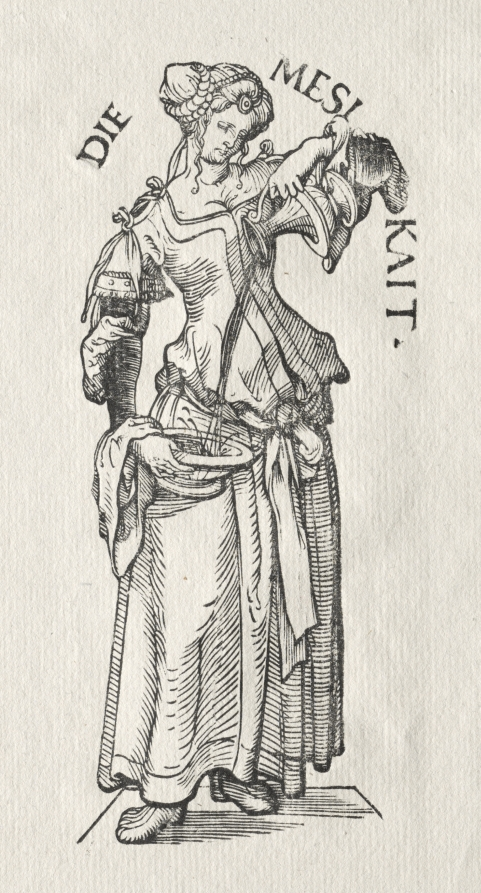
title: The Seven Virtues: Temperance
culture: Germany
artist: Hans Burgkmair (German, 1473–1531)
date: ca. 1510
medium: woodcut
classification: Print